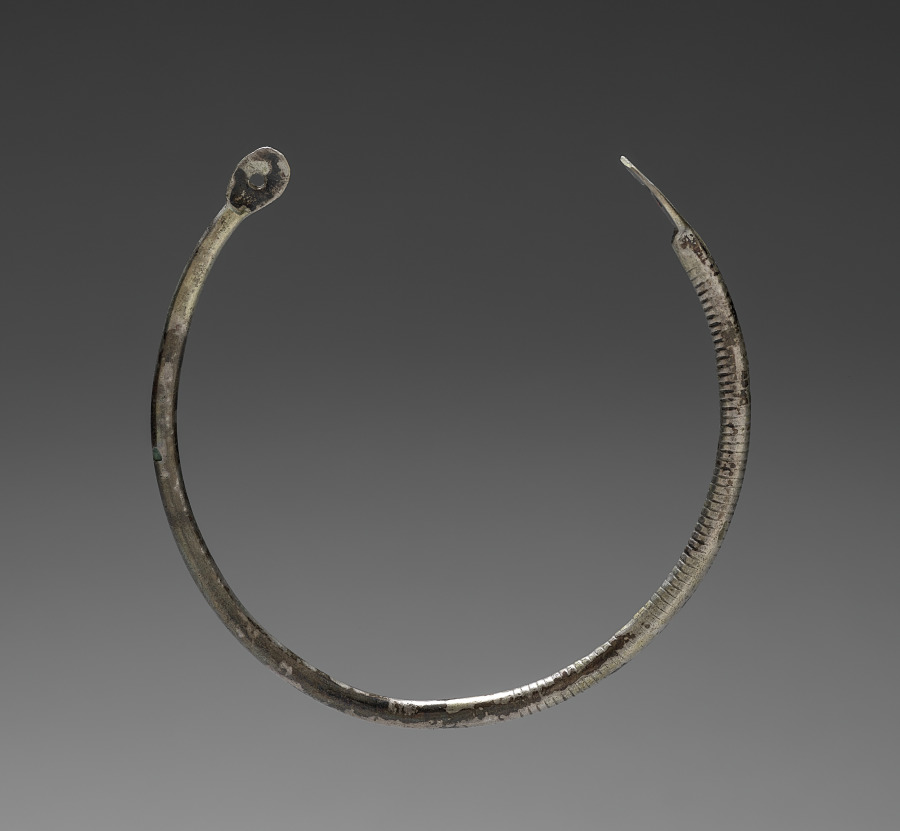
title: Nose Ring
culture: Indo-Chinese, made in France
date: 20th Century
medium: silver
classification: Jewelry